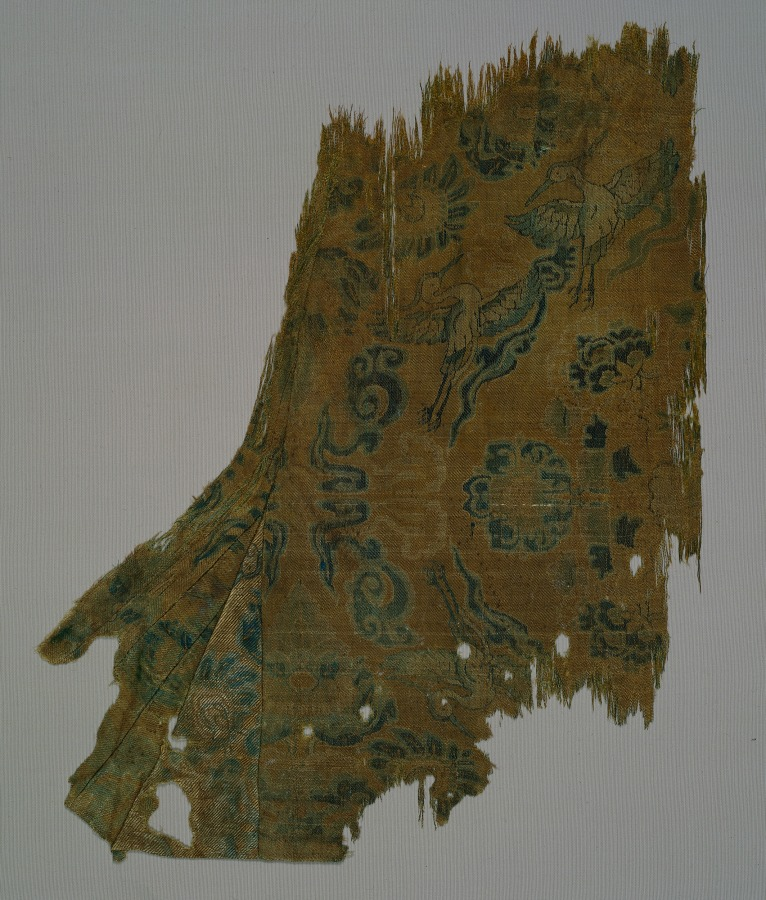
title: Fragments from a Garment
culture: China, Liao dynasty (916-1125)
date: 900s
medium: Silk, weft-faced compound twill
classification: Textile